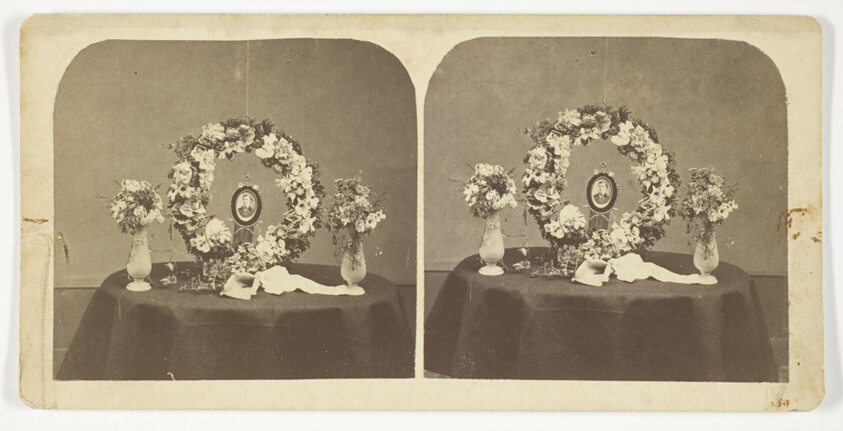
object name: Photograph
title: Untitled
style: 19th century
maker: Artist unknown; American, late 19th century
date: 1875/99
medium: Albumen print, stereo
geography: United States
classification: photography; photograph